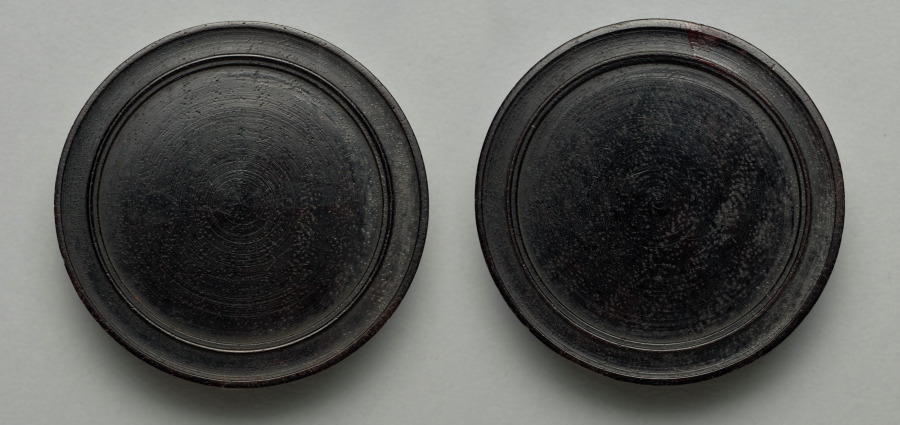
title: Gaming Piece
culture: Germany, late 17th-early 18th Century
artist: Martin Brunner (German, 1659–1725)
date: c.1700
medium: wood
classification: Furniture and woodwork